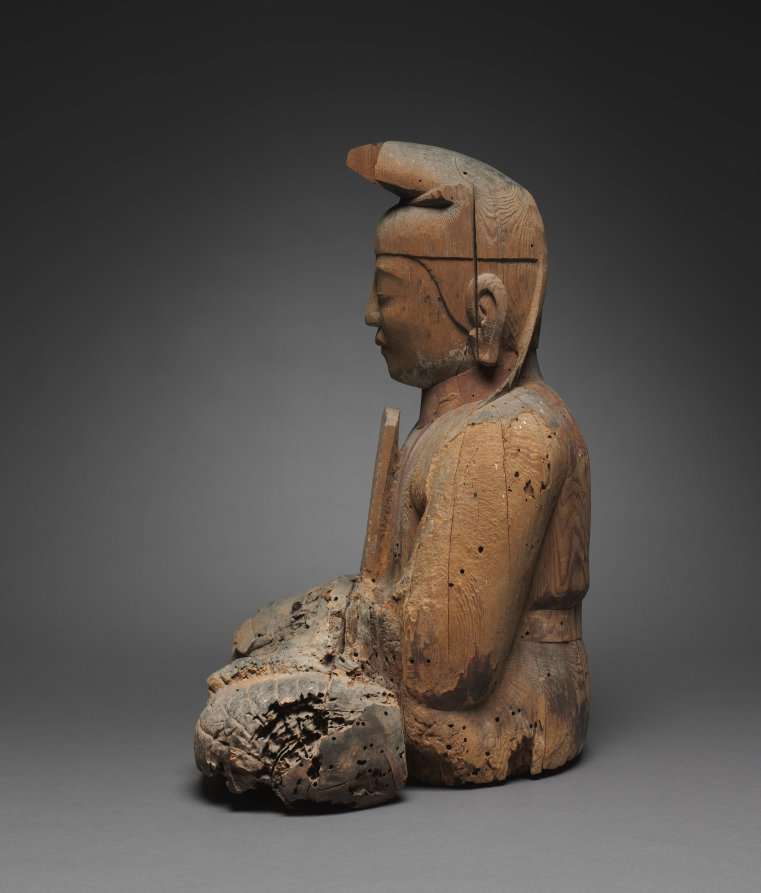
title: Shinto Deity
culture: Japan, Heian period (794–1185)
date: 900s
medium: wood, with traces of polychromy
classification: Sculpture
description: These sculptures represent kami, the name for deities associated with the Japanese religious tradition known as Shinto. They are said to have originally been created for the Usa Hachiman shrine in Oita on the island of Kyushu. Usa Hachiman Shrine houses four main kami: Hime Okami, who assists those engaged in agriculture and sea travel; the legendary 5th-century emperor Ojin deified as the kami Hachiman; Empress Jingu; and the kami of Mount Kawara, who aids copper miners. The identities of these two figures are unknown, but they belong to a larger group containing at least three other deities.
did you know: Traces of pigment on the surface of this sculpture indicate it was once painted.